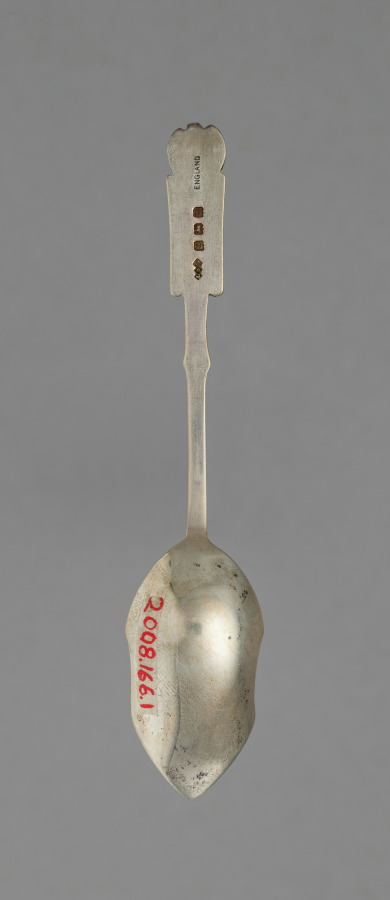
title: Set of six Spoons in Original Box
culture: England, London, 19th century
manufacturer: Liberty and Company (British)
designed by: attributed to Archibald Knox (British, 1864–1933)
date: c. 1895–1910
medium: Silver, enamel decoration and leather box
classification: Silver